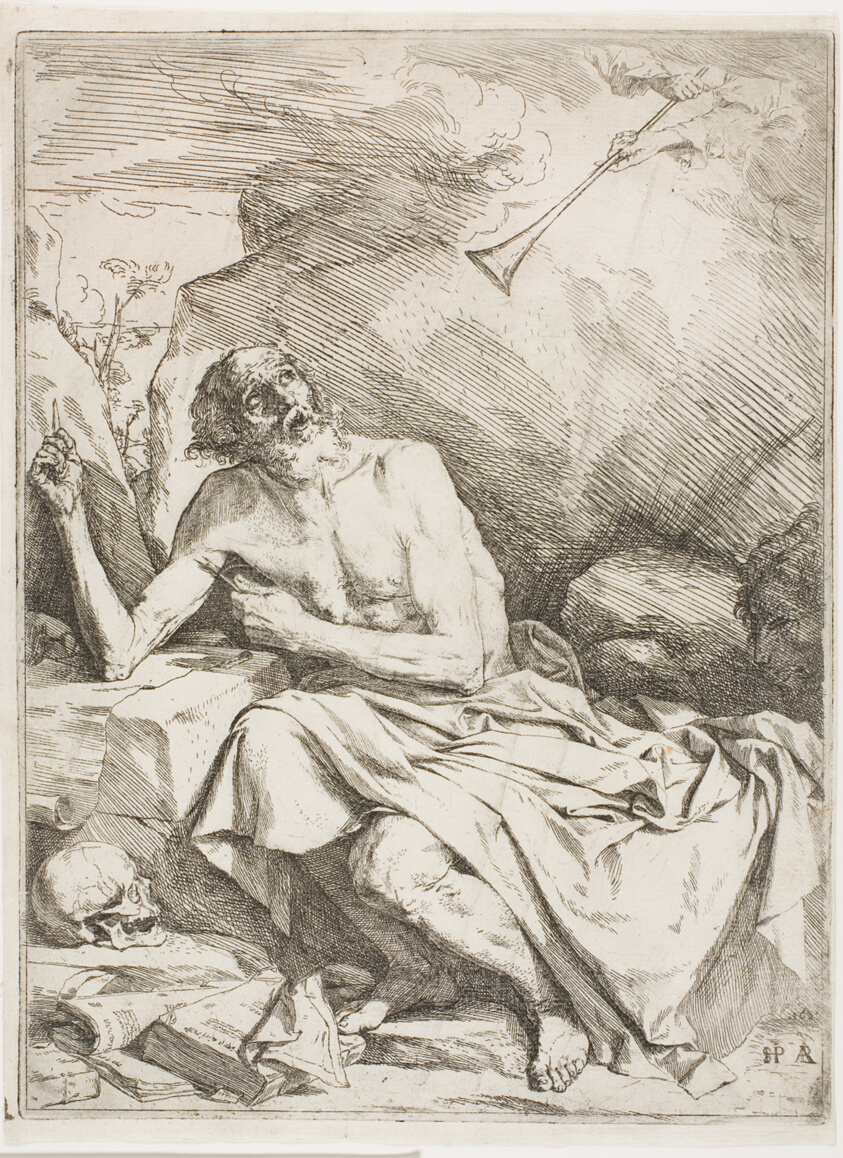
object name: Print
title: St. Jerome Hearing the Trumpet of the Last Judgment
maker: Jusepe de Ribera (Spanish, 1591-1652)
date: 1621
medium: Etching and engraving on paper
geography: Spain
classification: engraving; print; prints and drawing